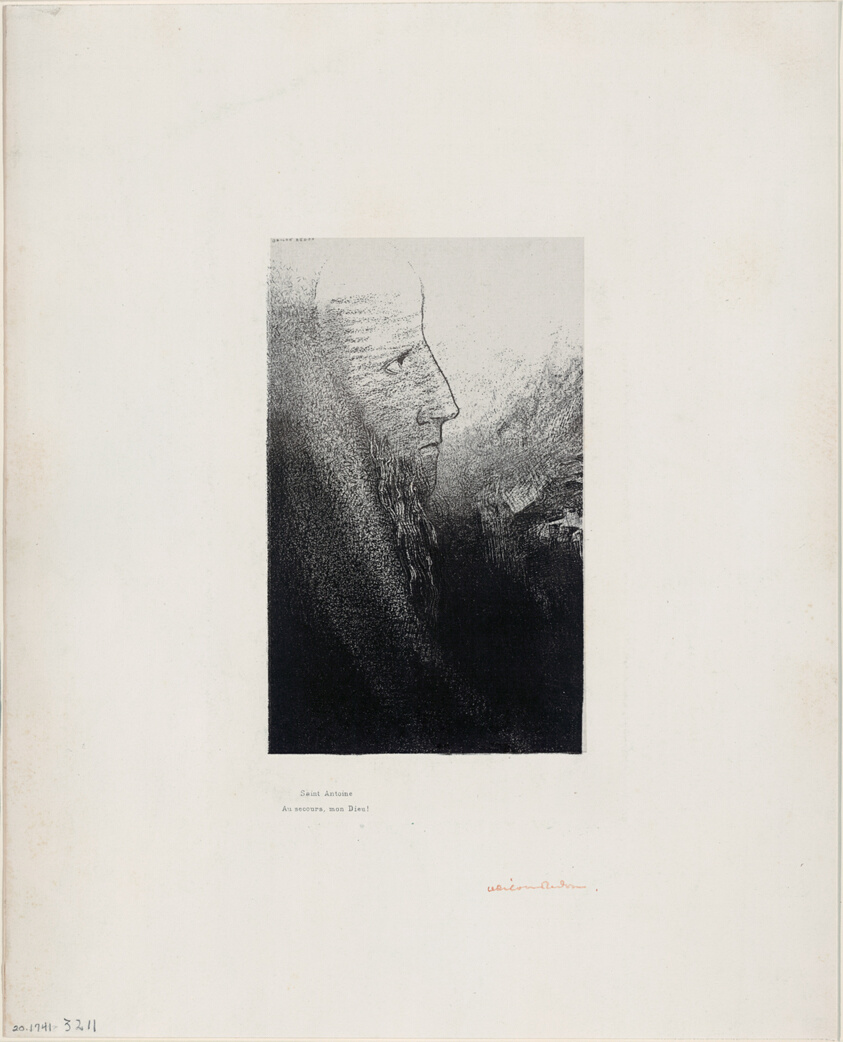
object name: Print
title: Saint Anthony: "Help Me, O My God!", plate 2 of 24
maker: Odilon Redon (French, 1840-1916)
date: 1896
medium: Lithograph in black on light gray China paper laid down on ivory wove paper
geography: France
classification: lithograph; print; prints and drawing; paper